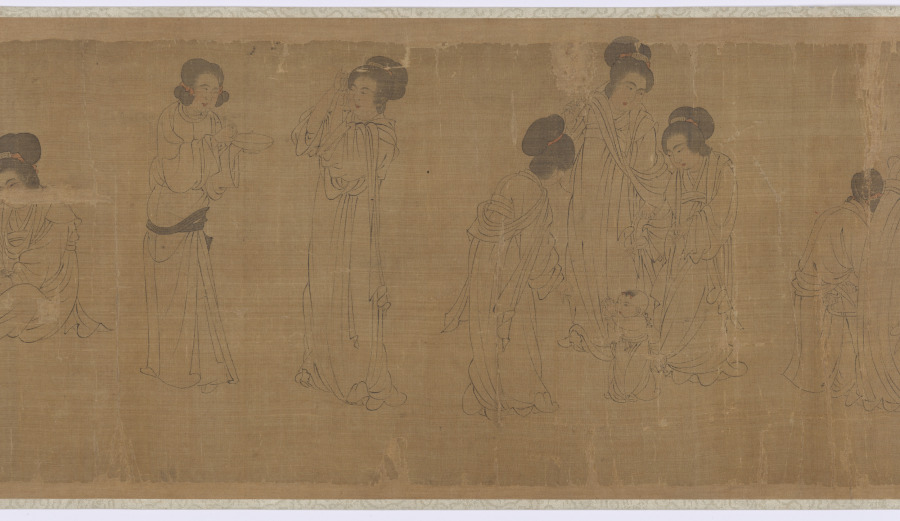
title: In the Palace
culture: China, Southern Song dynasty (1127-1279)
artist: after a work attributed to Zhou Wenju (Chinese, active 942–961)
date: before 1140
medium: Handscroll; ink and light color on silk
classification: Painting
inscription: 1 colophon and 13 seals: 1 colophon and 1 seal of Zheng Cheng 張澂 (d. 1143); 12 seals unidentified.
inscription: Colophon by Zhang Cheng 張澂 (d. 1143): 周文矩宮中圖婦人小兒其數八十，一男子寫神，而粧具、樂器、盆盂、扇椅席、鸚鵡、犬蝶不與。文矩句容人，為江南翰林待詔。作士女體近周昉，而加纖麗。嘗為後主畫南莊圖，號一時絕筆。它日上之朝廷，詔籍之祕閣。宮中圖云是真蹟，藏前太府卿朱載家。或摹以見餽。婦人高髻自唐以來如此。此卷豐肌長襦裙，周昉法也。予至嶠南，於端溪陳高祖之裔，見其世藏諸帝像，左右宮人梳髻與此畧同。而丫鬟乃作兩大鬟，垂 肩項間，雖醜而有真態。李氏自謂南唐，故衣冠多用唐制，然風流寔承六朝之餘。畫家者言辨古畫當先問衣冠車服，蓋謂是也。紹興庚申五月乙酉澹嵒居士題。 印：張澂印章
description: In the Palace depicts 13 ladies of the imperial household, three servants, and six children in fluent baimiao (plain drawing) brushwork, accentuated by color. The women entertain themselves by making music, tending children, and playing with pets. Their elaborate hairstyles, plump figures, and flowing robes are reminiscent of Tang dynasty fashion. The scroll illustrates elegant court life and is a direct copy of the original by Zhou Wenju (active 940–75) from Zhenjiang, Jiangsu province. Zhou was employed at the Southern Tang court in Nanjing under Emperor Li Yu (reigned 961–76), a prolific poet.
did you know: The ladies' elaborate hairstyles, plump figures, and flowing robes are reminiscent of Tang dynasty fashion.